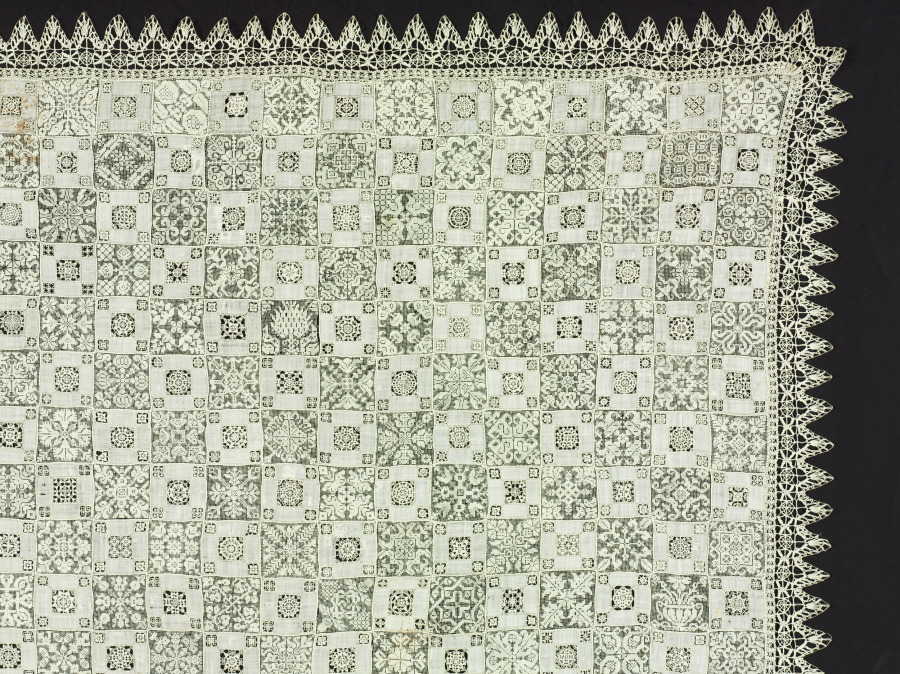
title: Cloth with Floral and Vegetal Patterns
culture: Italy, late 1500s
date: 1560–1600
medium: Bleached linen (est.): needle lace, filet/lacis (knotted ground and darned in two directions), alternating reticella squares (open cutwork), and bobbin lace edging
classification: Lace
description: Textiles often incorporate multiple needlework techniques within a single piece. One of the main techniques in this example of lace is called cutwork. In cutwork, portions of the textile ground, such as a linen or cotton cloth, are cut away and threads are removed to create holes. The edges of the hole are then reinforced with embroidery and a pattern of needle lace can be created within the perimeter. Rather than adding to the cloth to create a design, the craftsperson removes threads to fabricate a pattern.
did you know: The large size and square shape suggest that this textile would likely have been used as a table cloth.